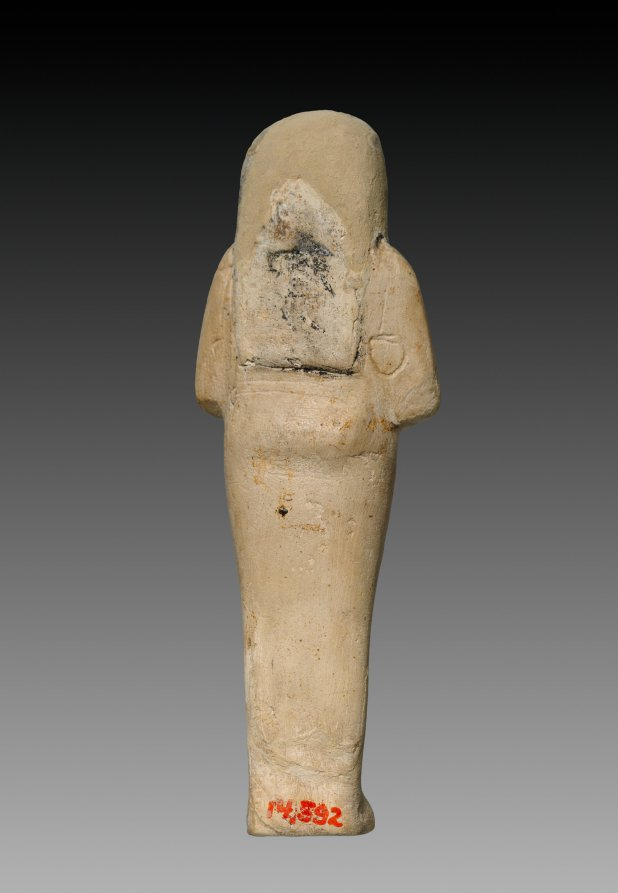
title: Shawabty of Takai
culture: Egypt, New Kingdom (1540–1069 BCE), Dynasties 18–19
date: c. 1350–1250 BCE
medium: limestone, originally painted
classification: Funerary Equipment